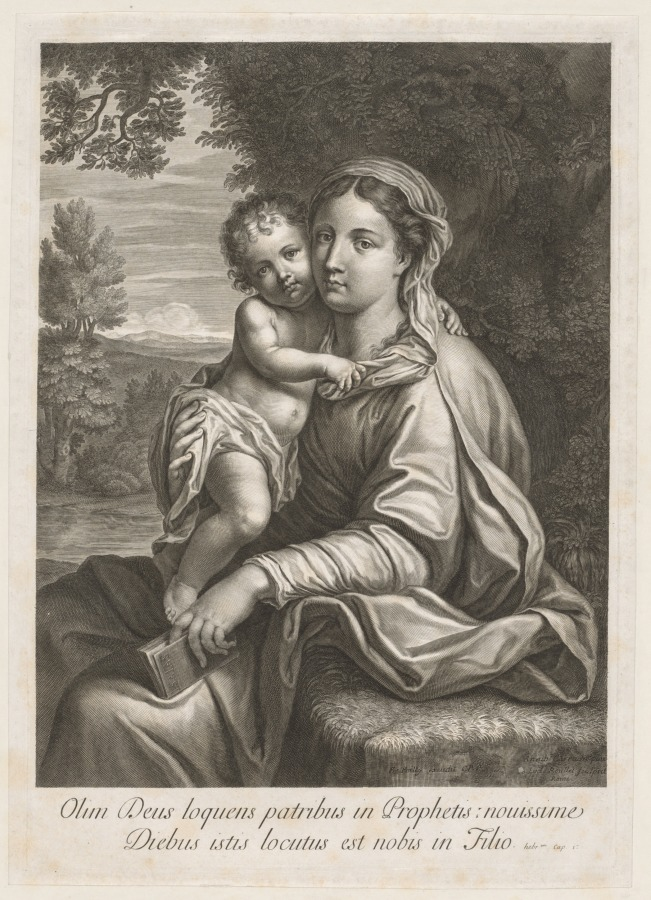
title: Madonna and Child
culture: France, 17th century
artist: Jean Louis Roullet (French, 1645–1699)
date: late 1600s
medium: engraving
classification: Print